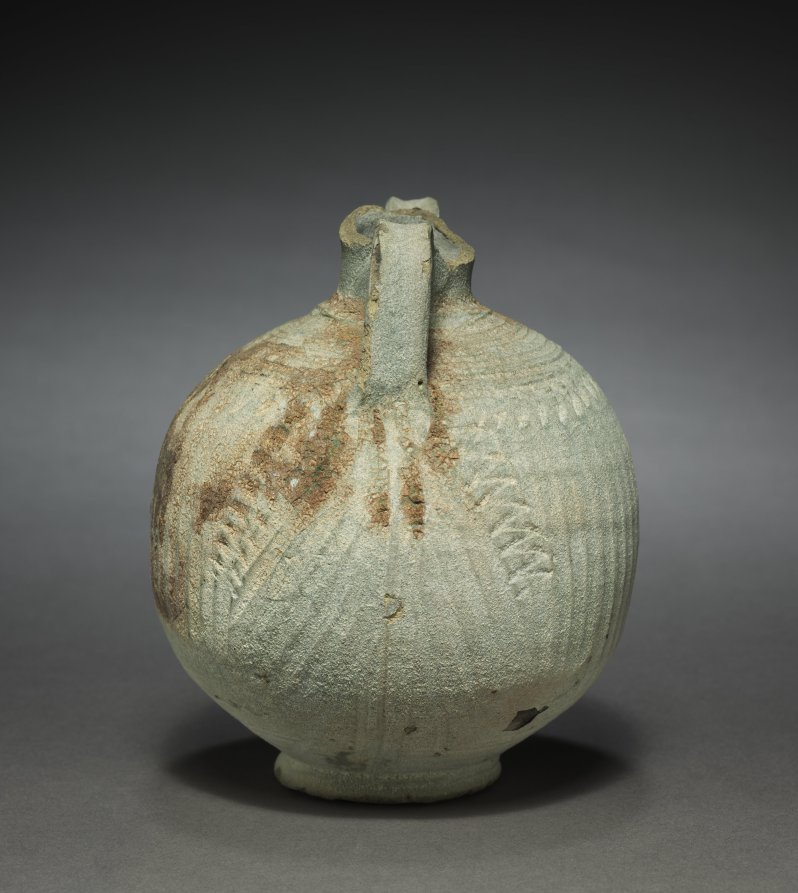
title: Jar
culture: Parthian Empire (247 BCE–224 CE)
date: 1–200 CE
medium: terracotta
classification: Ceramic